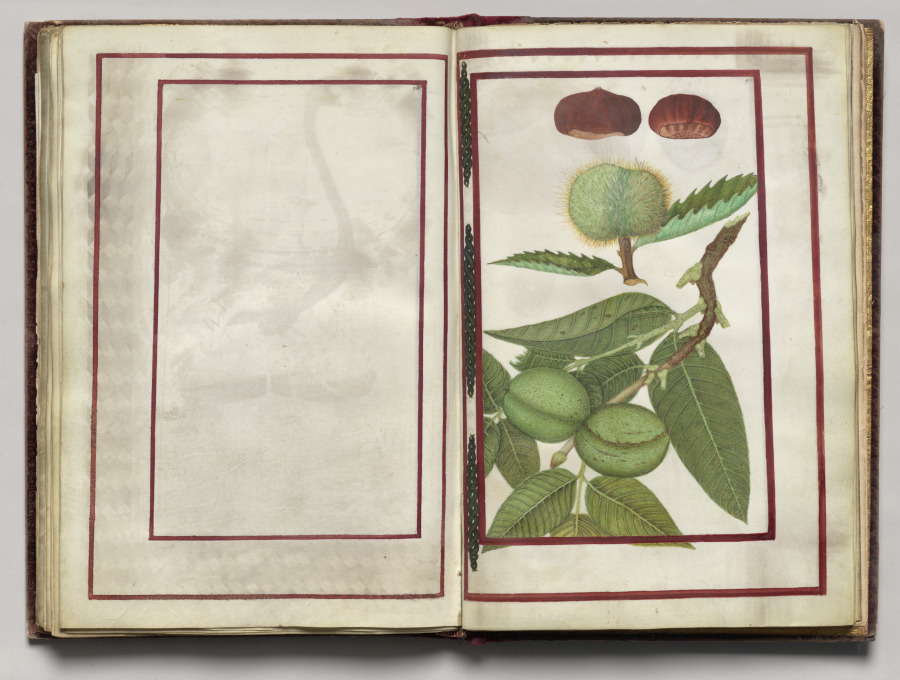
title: Chestnuts with Nut Tree, folio 43 (recto), from Florilegium (A Book of Flower Studies)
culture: France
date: 1608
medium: watercolor, ink, silver, and gold over occasional traces of pencil, on vellum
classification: Bound Volume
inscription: Dated: Poitiers 1608 (on frontispiece) Signed: On frontispiece in black ink, lower right: Van Kuyk Notation on drawing: Frontispiece: in pencil, lower margin: * élève de Van Kessel, peintre flammand (* in pencil also appears in front of Van Kuyk's name).